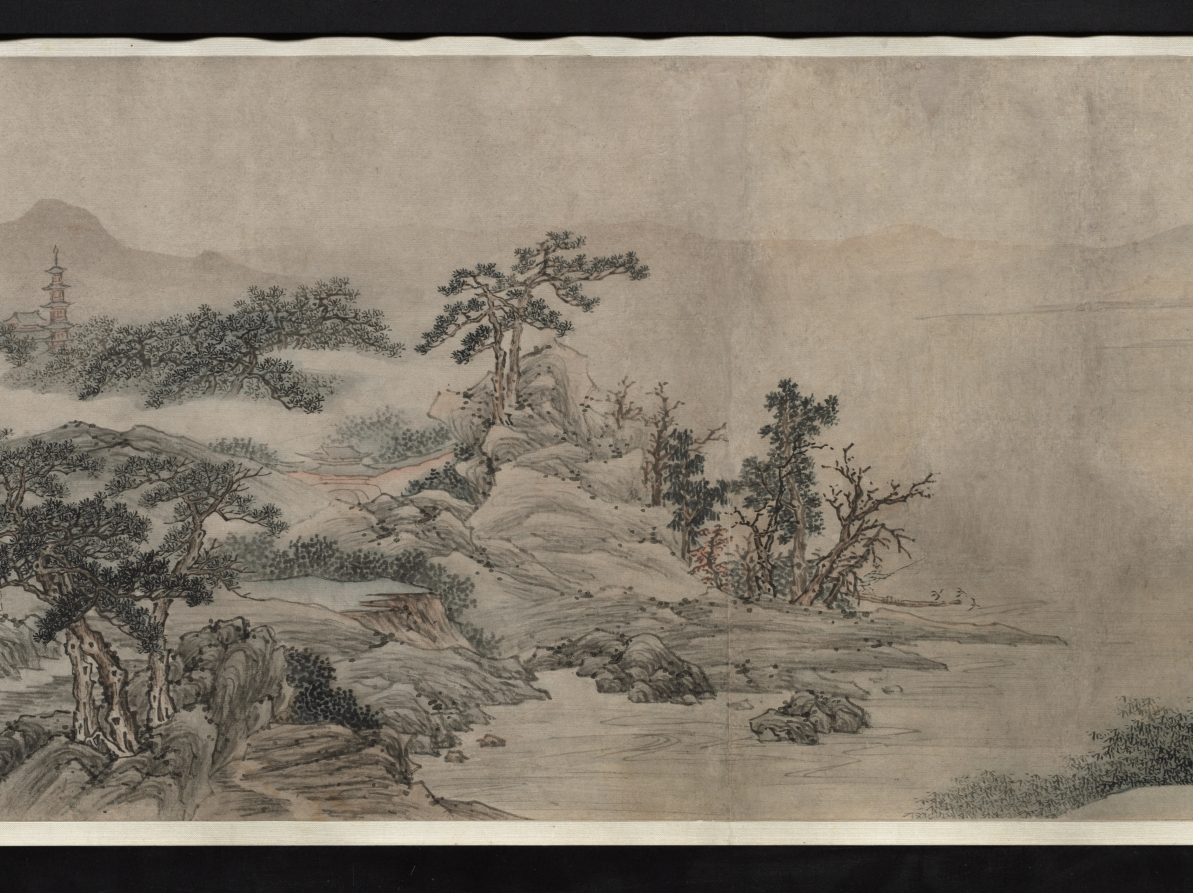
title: Autumn Mist in the Countryside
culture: China, Qing dynasty (1644-1911)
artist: Zou Zhe (Chinese, c. 1610-before 1688)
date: 1647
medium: handscroll, ink and color on paper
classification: Painting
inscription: Artist's inscription, signature, and seal: The first day of the sixth lunar month, the ting-hai year [1647], Tsou Che painted [this]. [seal] Fang-lu.